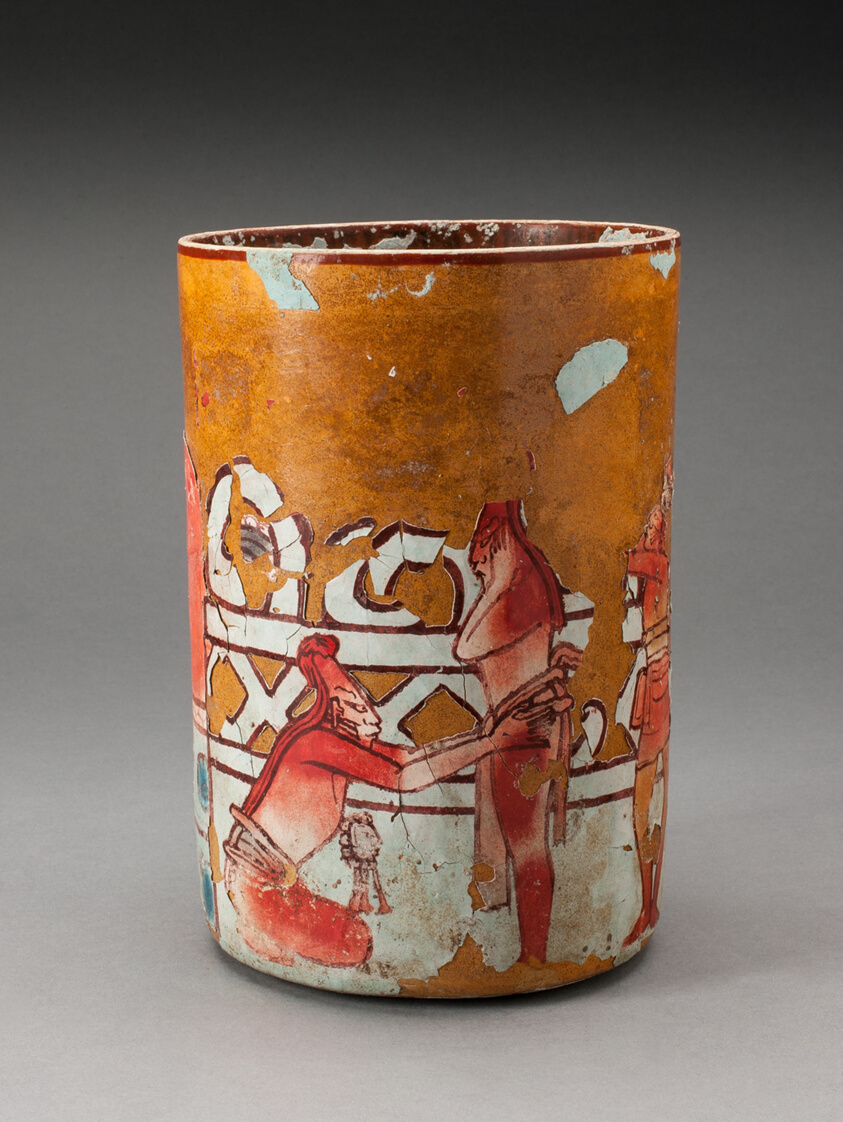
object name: Vessel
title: Vase Depicting a Courtly Scene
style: maya, mayan, americas, Arts of the Americas, mesoamerican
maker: Late Classic Maya; Petén region, Guatemala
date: 600–800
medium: Earthenware, slip, stucco, and pigment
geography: Guatemala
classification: earthenware; art of the americas; ceramics; vessel